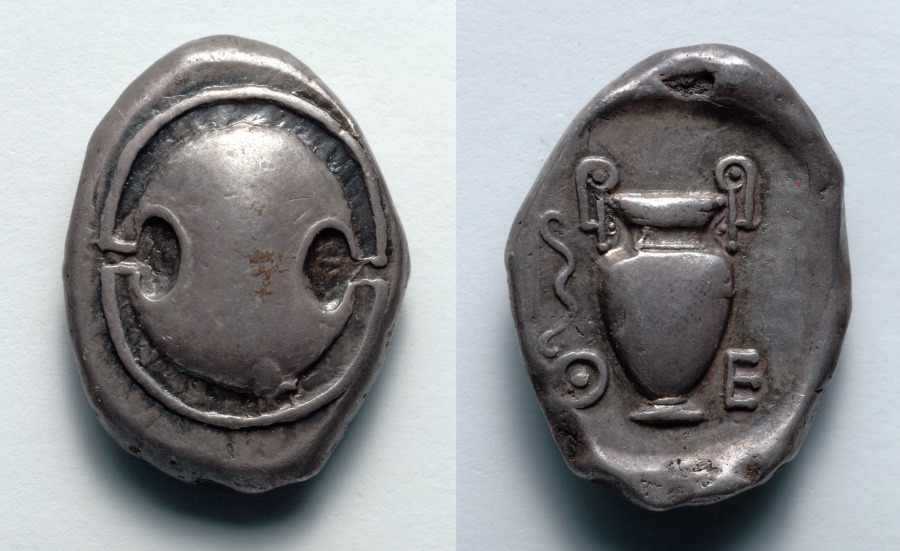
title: Stater: Boiotian Shield (obverse); Volute-Krater (reverse)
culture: Greek, minted at Thebes (Boiotia)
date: 395–387 BCE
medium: silver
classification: Coins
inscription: Θ | Ε